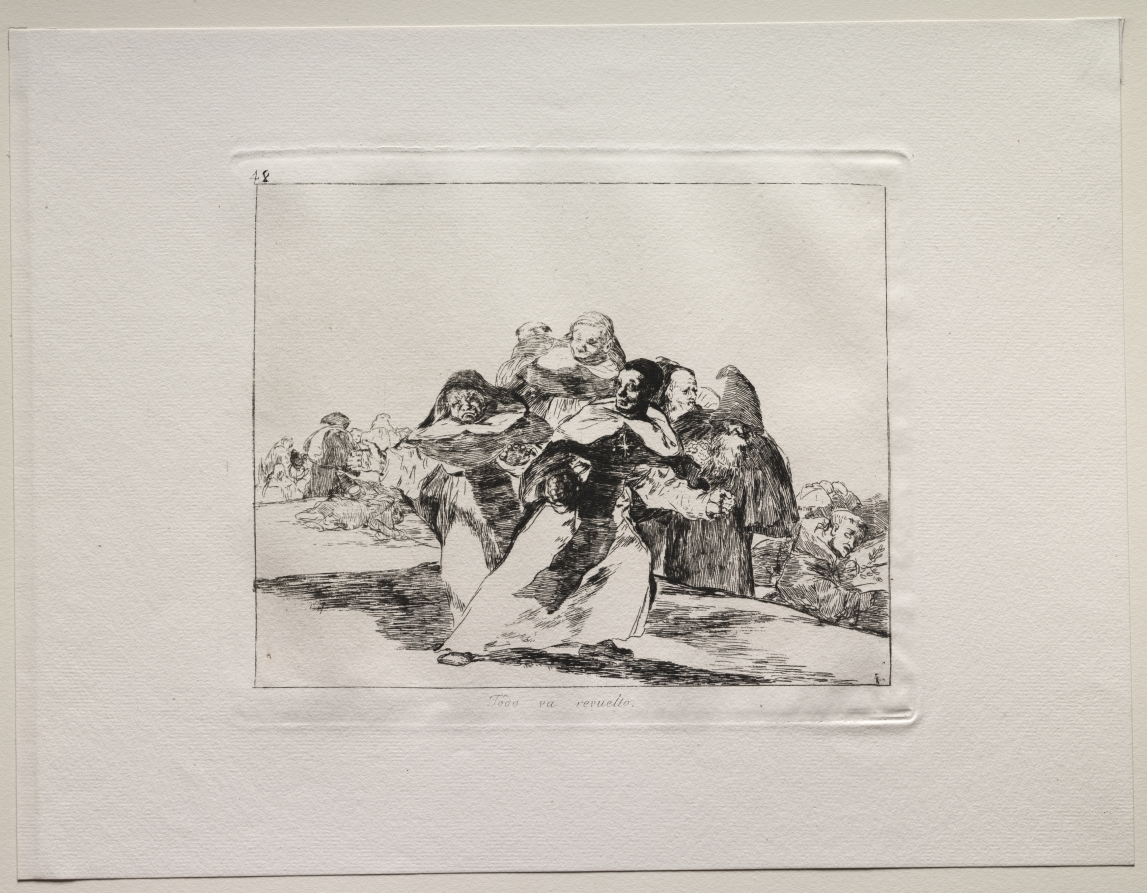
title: The Horrors of War: Everything is Topsy-Turvy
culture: Spain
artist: Francisco de Goya (Spanish, 1746–1828)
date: c. 1810–20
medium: etching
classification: Print